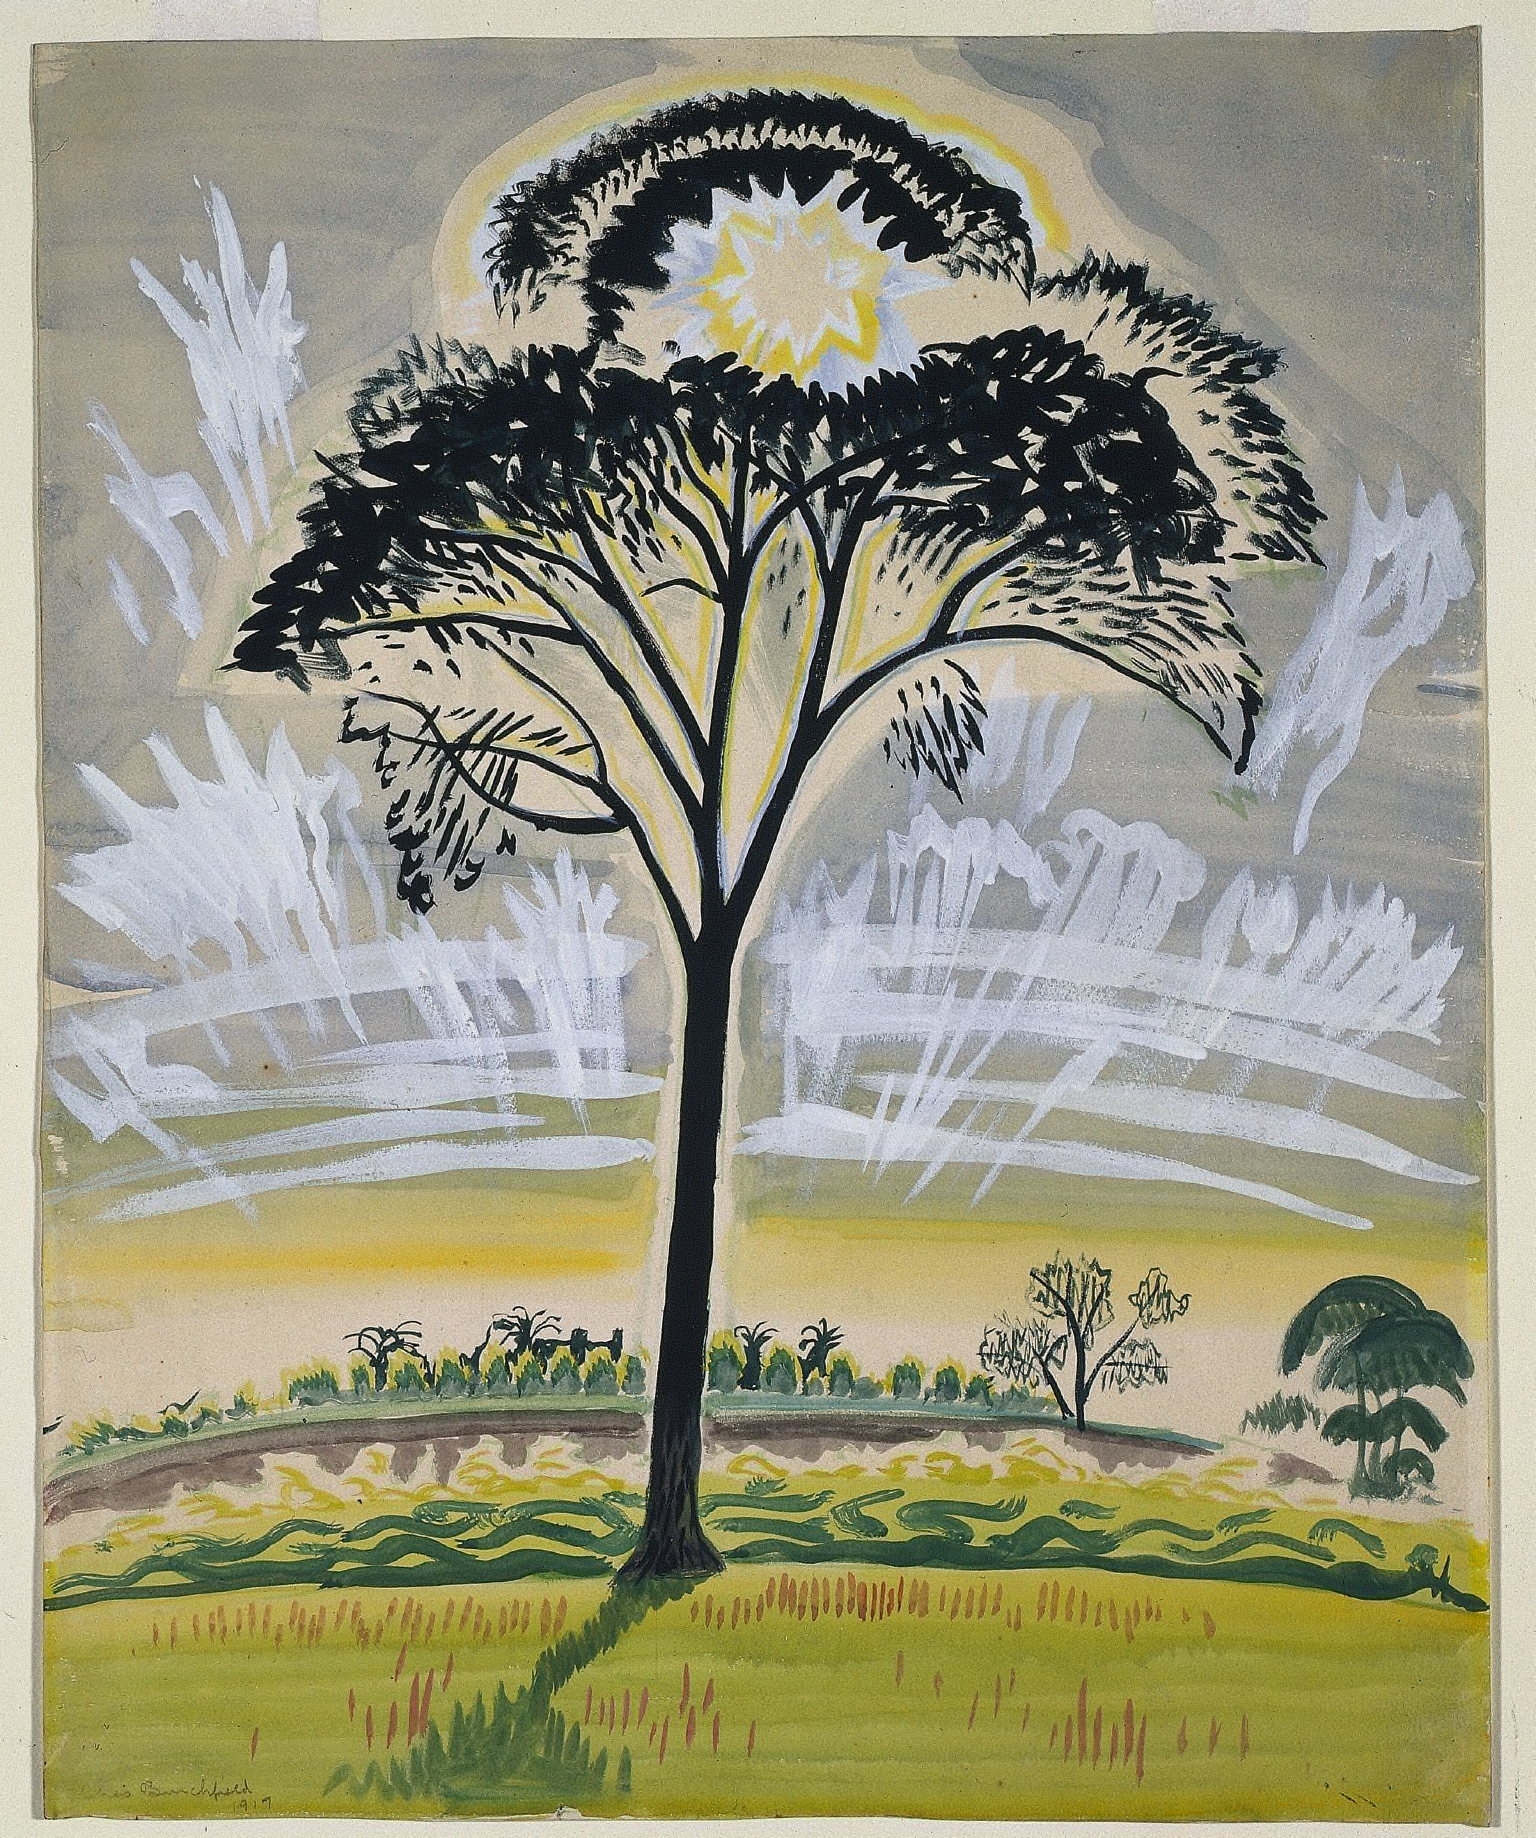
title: The Sun Through the Trees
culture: America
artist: Charles Burchfield (American, 1893–1967)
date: June 30, 1917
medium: Watercolor and opaque watercolor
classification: Drawing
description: While sketching in the Ohio countryside in 1916, Burchfield began to represent the sun as a dramatic orb. This sheet is part of a group in which the artist suggested stained glass windows using trees and the sun. Here, branches reach toward the sun to form a dark, halo-like frame filled by sunlight that diffuses into an array of color. By combining landscape with religious iconography, Burchfield suggested the divine influence he saw in nature.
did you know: This work is an early example in which Burchfield began to paint directly and expressively with watercolor rather than carefully sketching out his composition in advance.